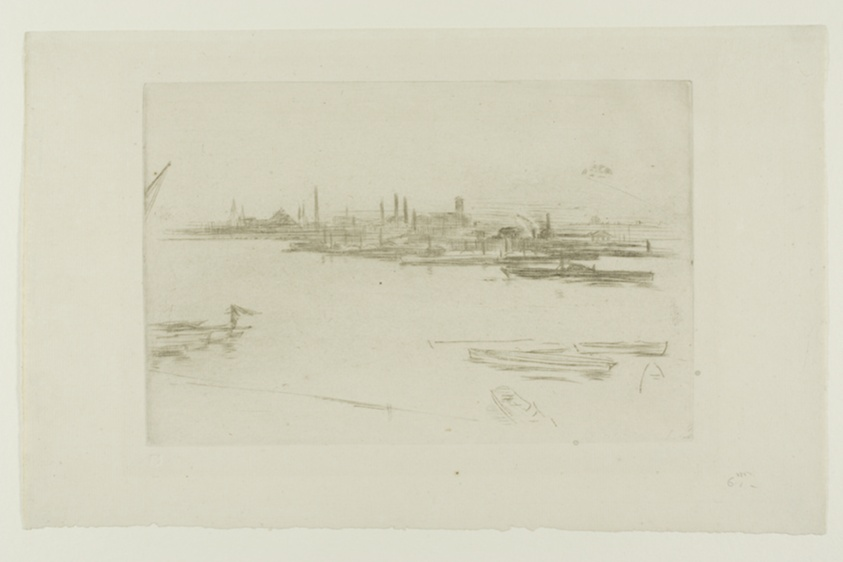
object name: Print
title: Battersea Morn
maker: James McNeill Whistler (American, 1834-1903)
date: 1877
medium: Drypoint in black ink on ivory laid paper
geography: United States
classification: drypoint; print; prints and drawing; paper